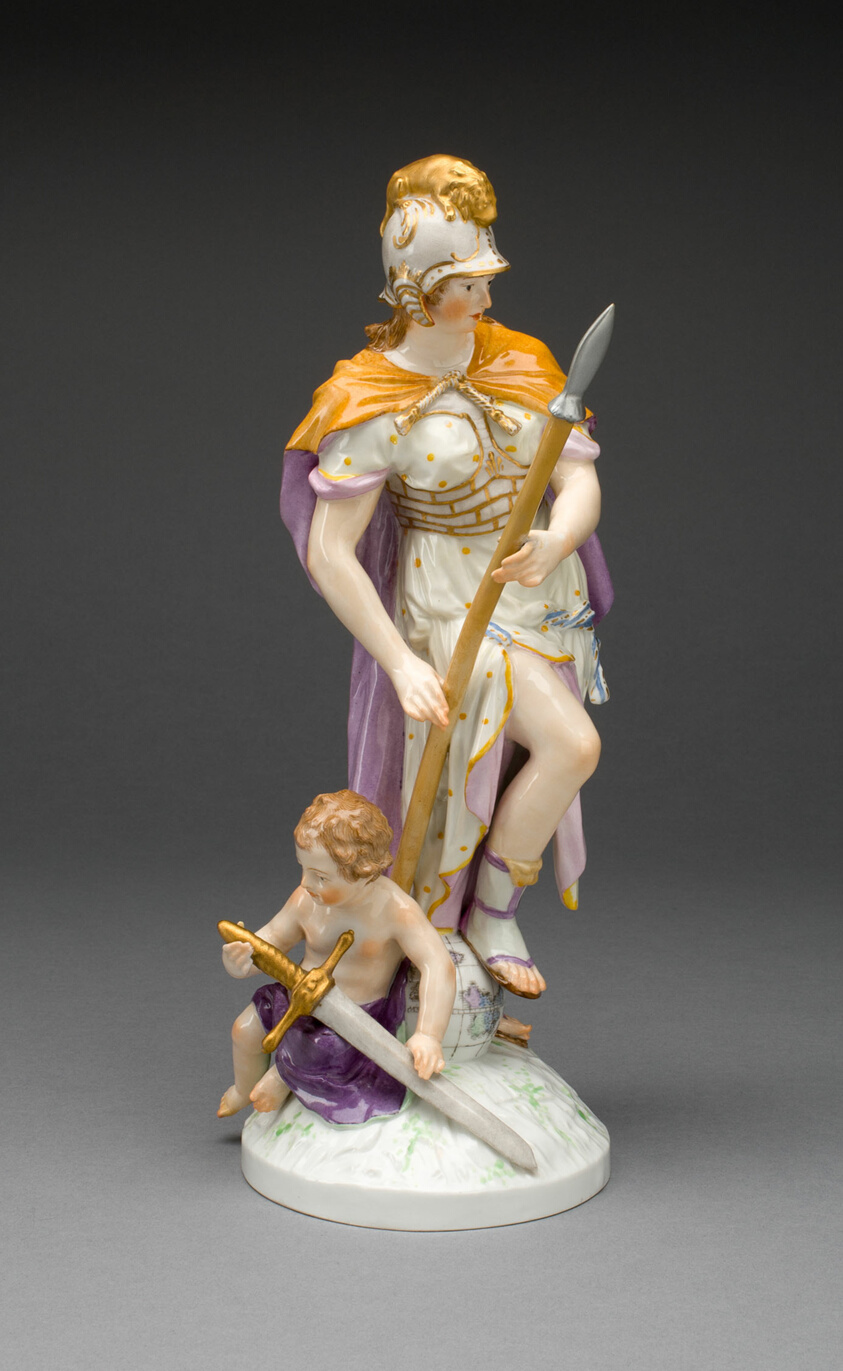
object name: Ceramics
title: Figure of Bravery (Herzhaftigkeit)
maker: Berlin Porcelain Manufactory (Königliche Porzellan-Manufaktur im Berlin); Germany, 1763-1918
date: c. 1775/80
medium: Hard-paste porcelain with polychrome enamels and gilding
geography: Berlin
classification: sculpture; ceramics; porcelain; european decorative arts